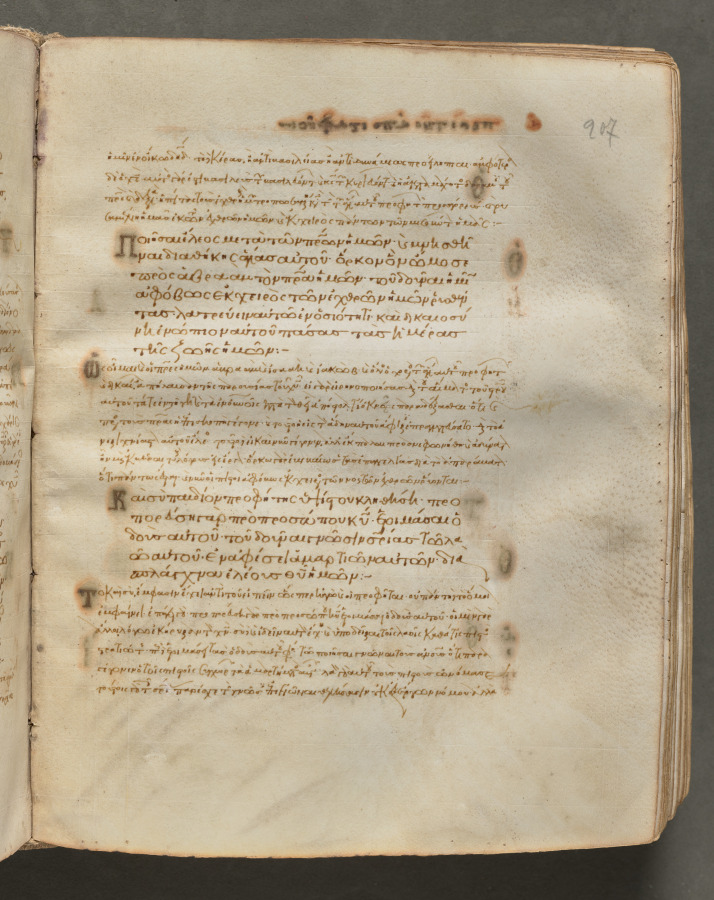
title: Text, folio 207 (recto), from a Gospel Book with Commentaries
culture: Byzantium, Constantinople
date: c. 1000–1100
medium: ink, tempera, and gold on vellum; leather binding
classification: Bound Volume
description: Each of the four gospels in this book opens on a page with brilliantly illuminated borders depicting the author of the text as well as birds-principally peacocks, symbols of the immortality of the soul-and fountains, representing the fountain of life and the salvation of the soul. This volume consists of 428 leaves with texts in Greek. Its level of sophistication suggests that it was probably written and decorated in a monastery in Constantinople.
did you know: Gospel Books were carried in procession through Byzantine churches.